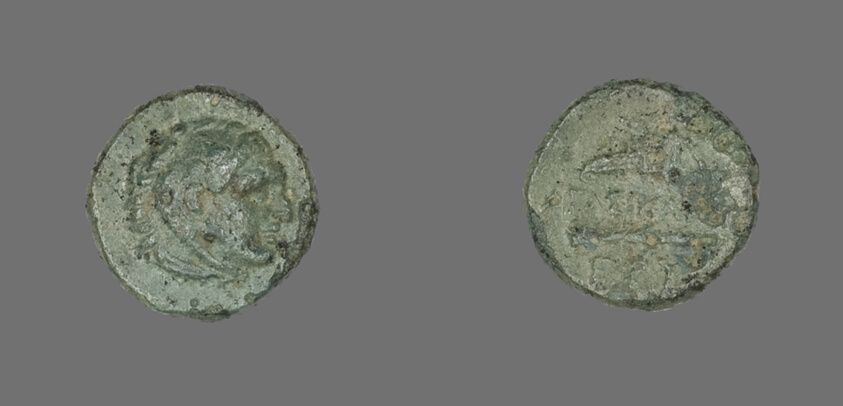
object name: Coin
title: Coin Depicting the Hero Herakles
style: greek, ancient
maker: Greek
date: 300-200 BCE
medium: Bronze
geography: Ancient Greece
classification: coin; ancient art